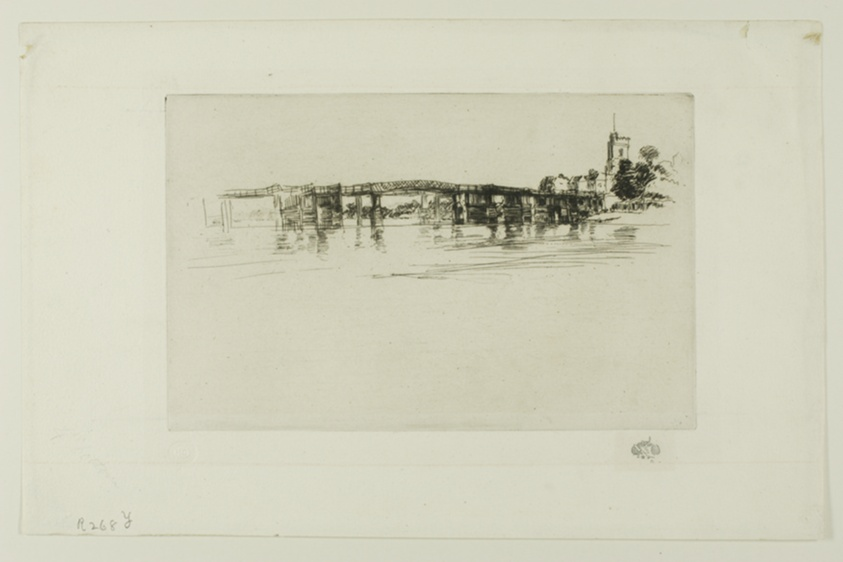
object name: Print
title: Little Putney Bridge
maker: James McNeill Whistler (American, 1834-1903)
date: 1879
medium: Etching and drypoint in black ink on ivory laid paper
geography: United States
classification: etching; print; prints and drawing; paper; drypoint